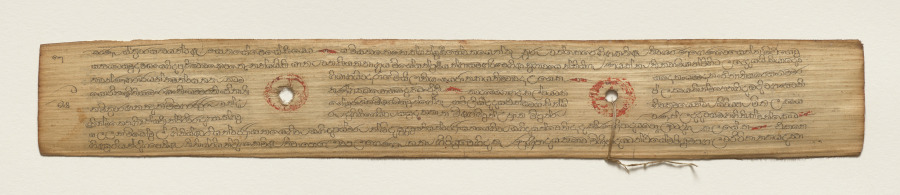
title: Leaf from a Buddhist Manuscript (recto)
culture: Sri Lanka, Singhalese, Late 17th century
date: c. 1700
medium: fiber paper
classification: Manuscript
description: Palm leaf material is still used for manuscripts in Sri Lanka. The palm leaves are prepared first by boiling them, drying them in the sun, and then rubbing them with oils. Scribes then use a metal stylus to incise the text. Then charcoal powder is wiped across the pages, filling in only the inscribed lines.